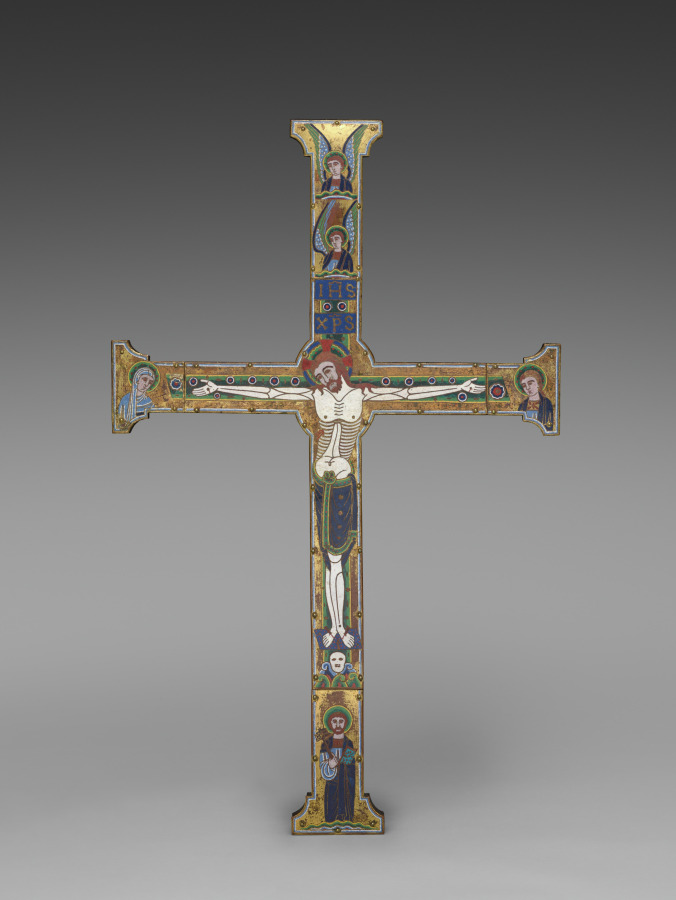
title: The "Spitzer Cross"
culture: France, Limoges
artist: Master of the Royal Plantagenet Workshop (French)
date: c. 1190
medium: copper: gilded, engraved, stippled; champlevé enamel; wood backing (modern)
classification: Enamel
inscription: inscription on titulus: IHS XPS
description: This fine enameled cross is named the "Spitzer Cross" after the Viennese art dealer and collector Baron Frédéric Spitzer, who owned it in the 19th century. It has justly been hailed as the finest Limoges enameled cross to survive. The work’s coloration exemplifies its refined craftsmanship. Rendered in white enamel, with fine lines defining the rib cage, abdomen, and muscles, Christ’s body contrasts strikingly with the vibrant green, blue, and yellow of his halo, loincloth, and the cross.